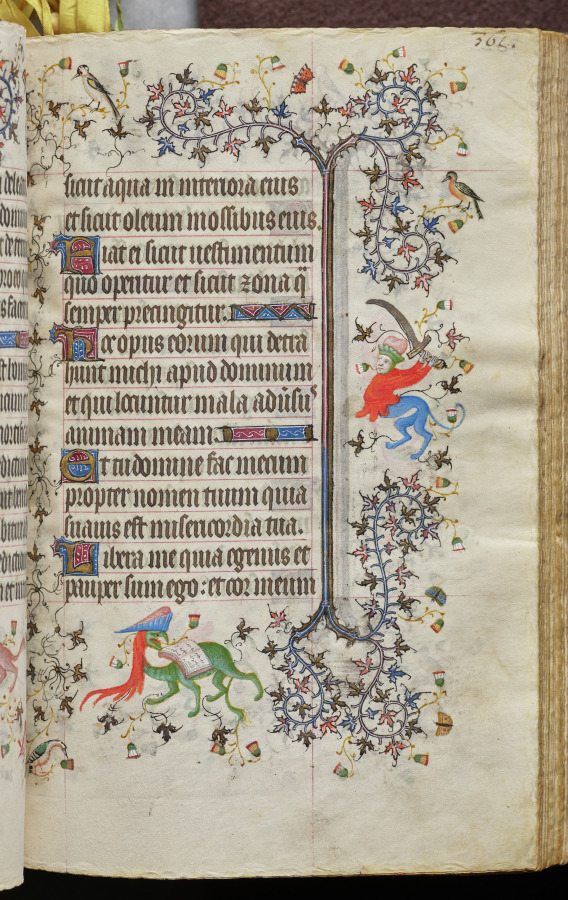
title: Hours of Charles the Noble, King of Navarre (1361-1425): fol. 176r, Text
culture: France, Paris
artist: Master of the Brussels Initials and Associates (French)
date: c. 1405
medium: ink, tempera, and gold on vellum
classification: Bound Volume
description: This precious volume was obviously highly prized by its owner, the French-born King of Navarre, who had his coat of arms painted on no less than twenty folios. Rather than directly commissioning this manuscript from a specific workshop, it seems that Charles the Noble acquired his book of hours -- perhaps ready-made for the luxury market -- while on a trip to Paris in 1404-05. A collaborative effort, six painting styles are evidenced within the pages of this codex, those of two Italians, two Frenchmen, and two Netherlanders. The painter who was responsible for the planning and decoration of the book, and who produced seventeen of the large miniatures, was a Bolognese artist known as the Master of the Brussels Initials. His principal assistant, responsible for most of the borders, was a Florentine who signed his name "Zecho" da Firenze on folio 208 verso.